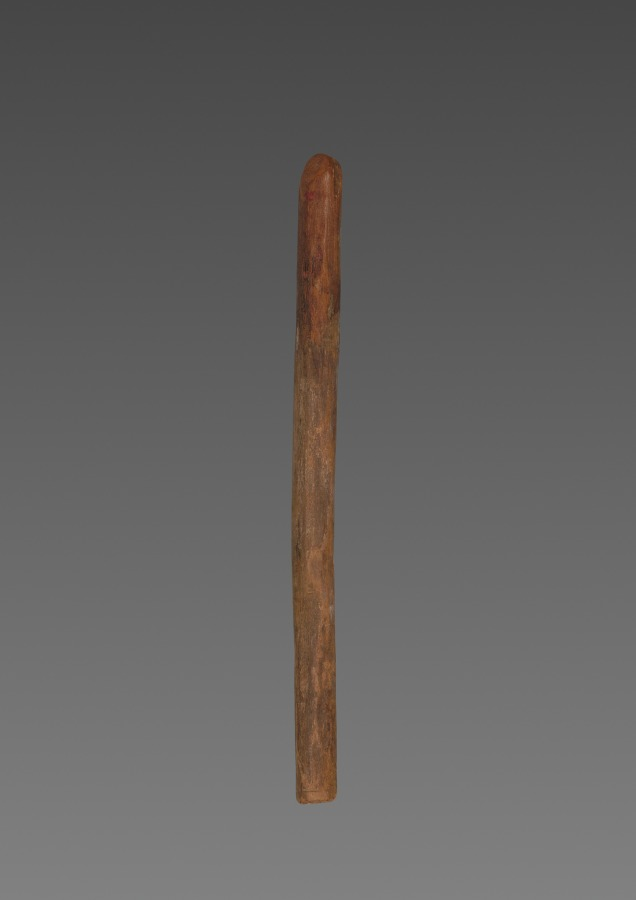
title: One of Three Pieces of an Arrow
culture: Egypt, First Intermediate period (2123–2040 BCE)–Middle Kingdom (2040–1648 BCE)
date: 2123–1814 BCE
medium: wood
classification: Arms and Armor